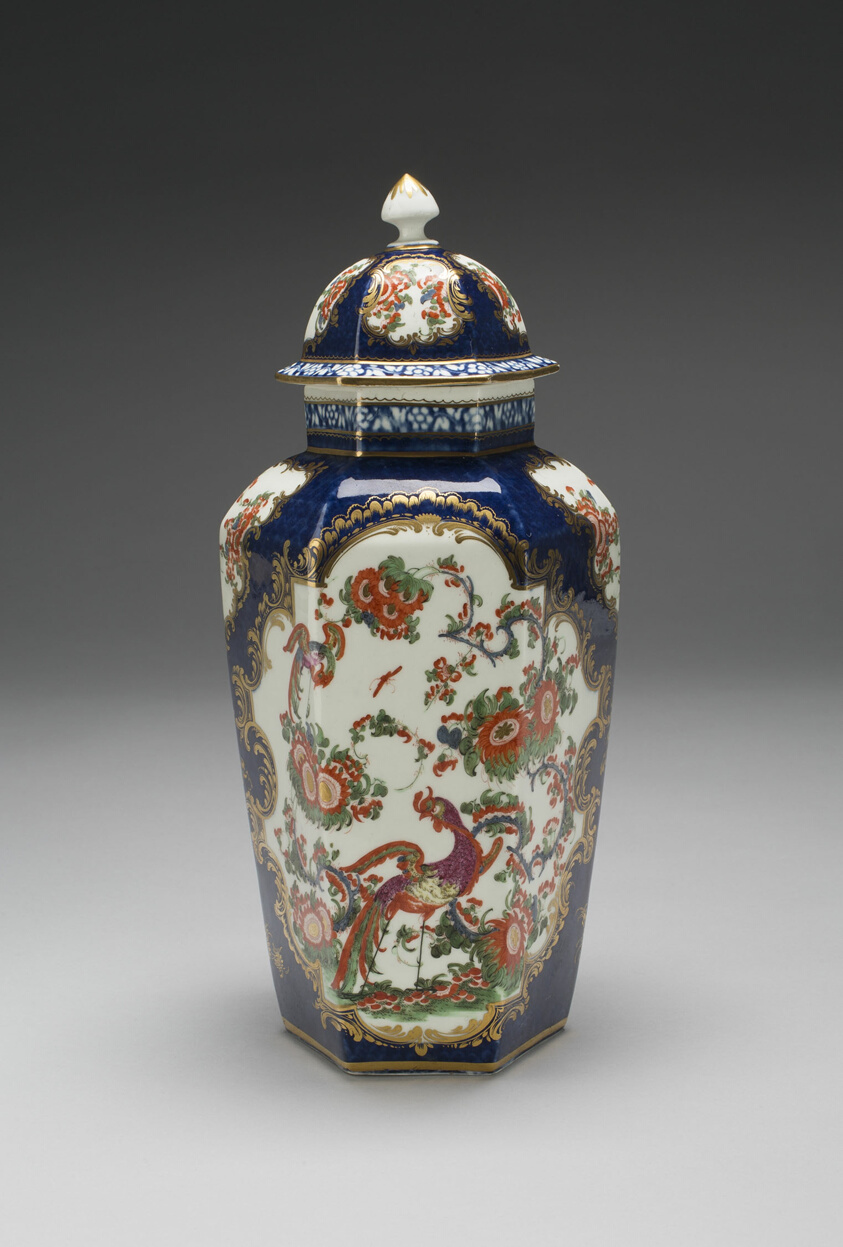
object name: Ceramics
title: Vase with Cover (one of a pair)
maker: Worcester Porcelain Factory (Warmstry House Period, 1751–1783); Worcester, England, founded 1751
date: c. 1770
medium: Soft-paste porcelain with blue scale ground and gilding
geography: Worcester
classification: vase; vessel; tableware; ceramics; porcelain; european decorative arts